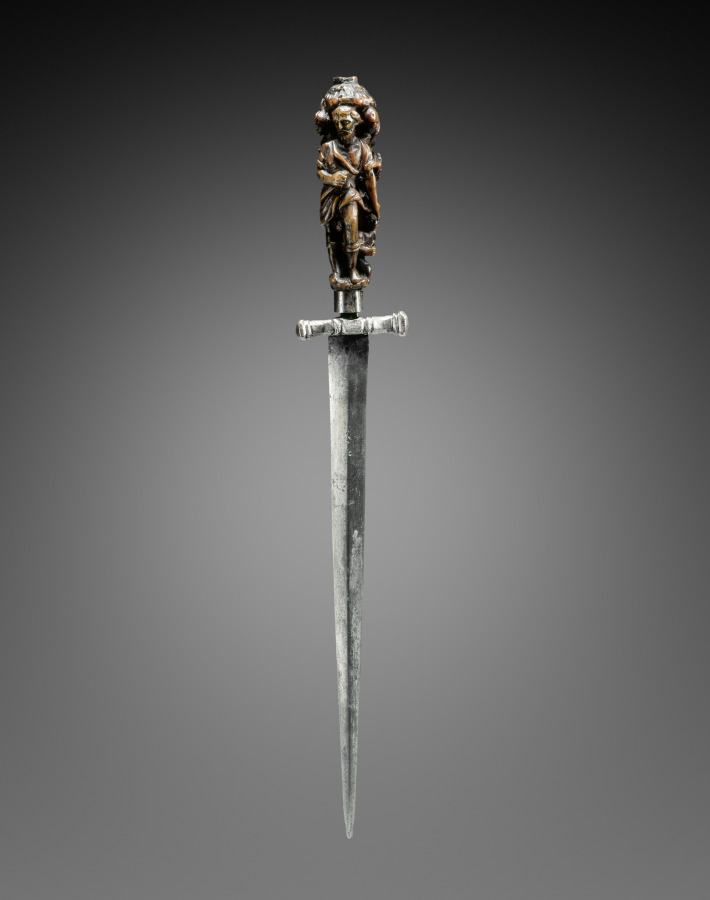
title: Dagger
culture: Italy, early 17th Century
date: early 1600s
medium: steel and horn (associated grip and blade)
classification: Arms and Armor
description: The carved grip of this dagger depicts the Old Testament story of the Sacrifice of Isaac.